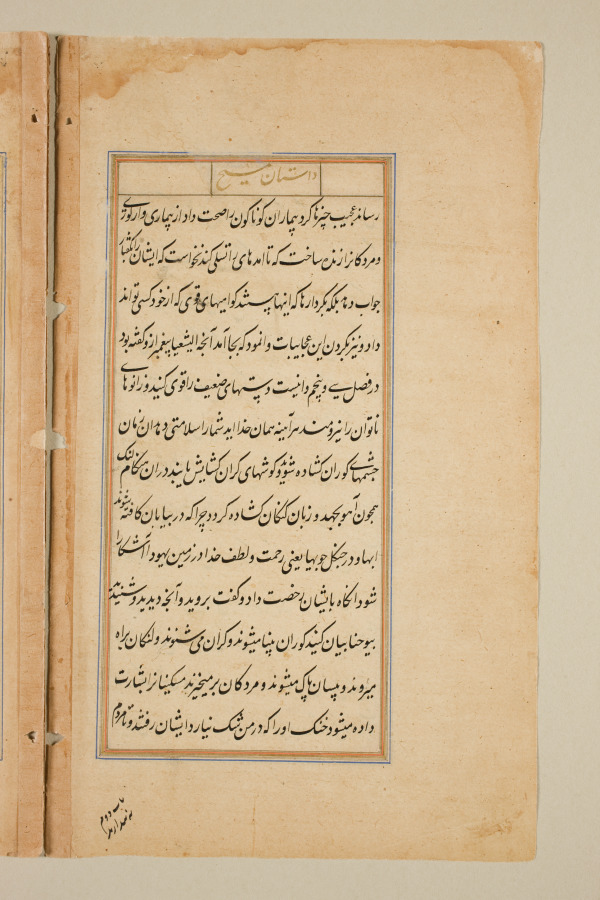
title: Text page from a Mirror of Holiness (Mir’at al-quds) of Father Jerome Xavier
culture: Mughal India, Allahabad, made for Prince Salim (1569–1627)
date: 1602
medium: Ink and gold on paper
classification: Manuscript